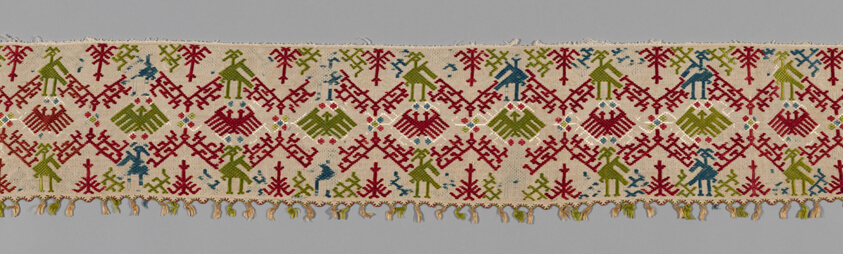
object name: Textile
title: Fragment (For a Bed Curtain)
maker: Greece, Cyclades Islands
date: 17th century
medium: Linen, plain weave; embroidered with silk in satin stitches; edged with silk in needle lace with attached silk tassels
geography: Cyclades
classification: textile; needlework (visual works)